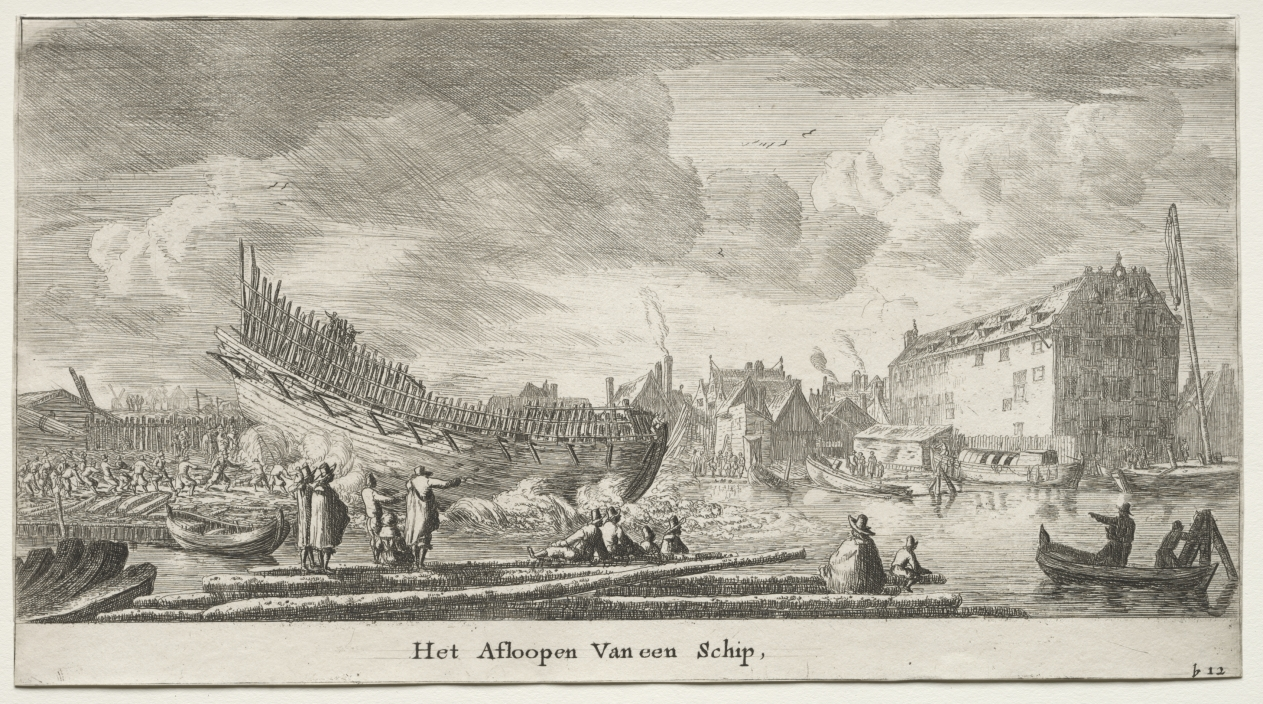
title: Various Ships and Views of Amsterdam (Verscheÿde Schepen en Gesichten van Amstelredam), Part II: Launching a Ship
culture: Netherlands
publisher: Clement de Jonghe (Dutch, 1579–1679)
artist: Reinier Nooms, called Zeeman (Dutch, c. 1623–1664)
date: 1652–54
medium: etching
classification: Print